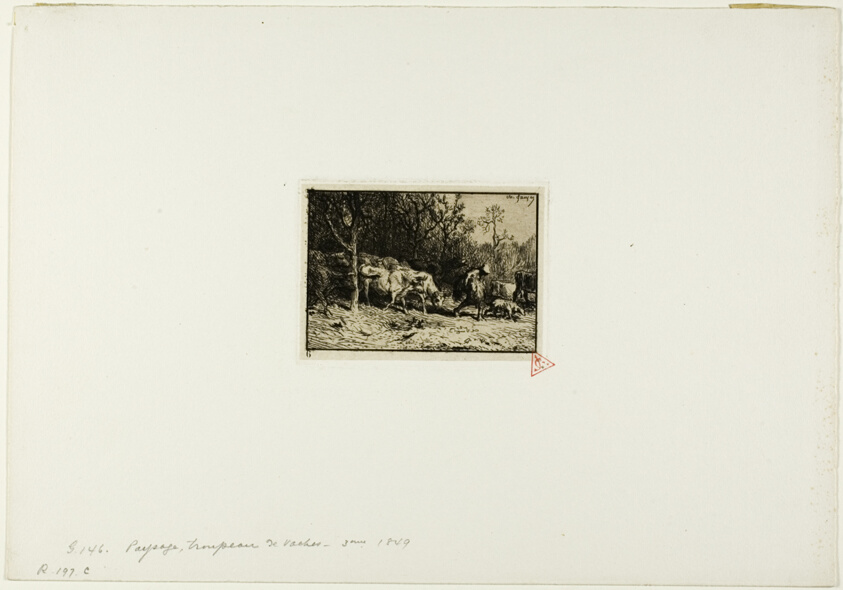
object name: Print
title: Herd of Cows Coming Out of a Wood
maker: Charles Émile Jacque (French, 1813-1894)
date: 1849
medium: Etching, engraving and drypoint on cream China paper laid down on ivory wove paper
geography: France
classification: etching; print; prints and drawing